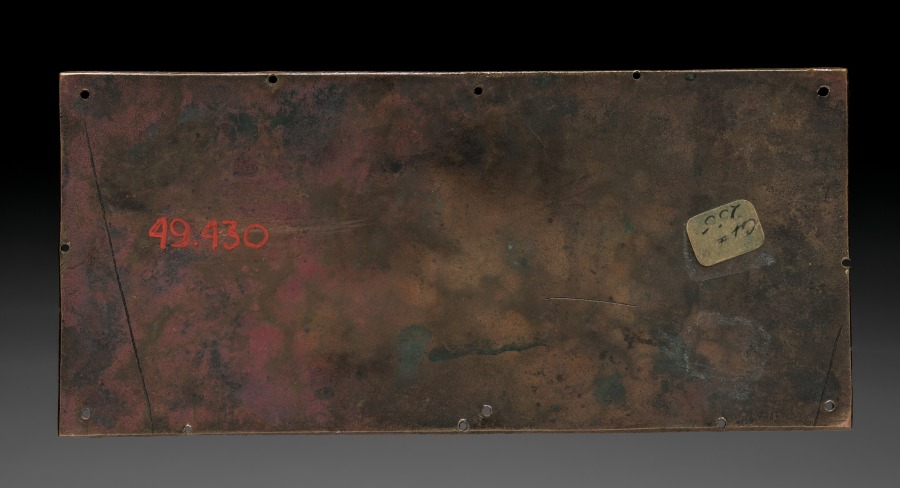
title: Condemnation and Martyrdom of Saint Lawrence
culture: Germany, Lower Saxony, Hildesheim?, Romanesque period, 12th century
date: c. 1180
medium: gilded copper, champlevé enamel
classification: Enamel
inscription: running inscription on the borders: ECCE / DEI MILES SVP(er)AT LAVREN/TIVS IGNE/S (Behold, the warrior of God overcomes the flames) S(an)C(tu)S LAVRENTIV/ S.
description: Champleve enameling is a process in which the artist carves designs into copper plates, and then powdered glass is applied before firing in a furnace, causing the glass to fuse into enamel. In this case, the copper was then gilded and polished. This type of enameling is still done today, mostly for jewelry and decorative items.